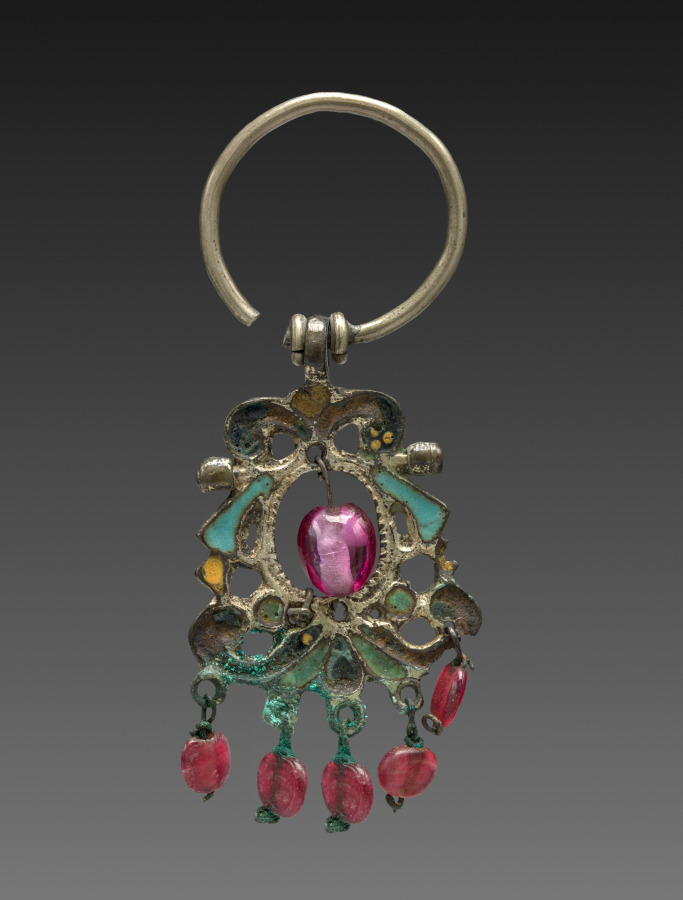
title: Earring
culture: Russia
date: 1800s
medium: silver, enamel, and red glass beads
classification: Jewelry